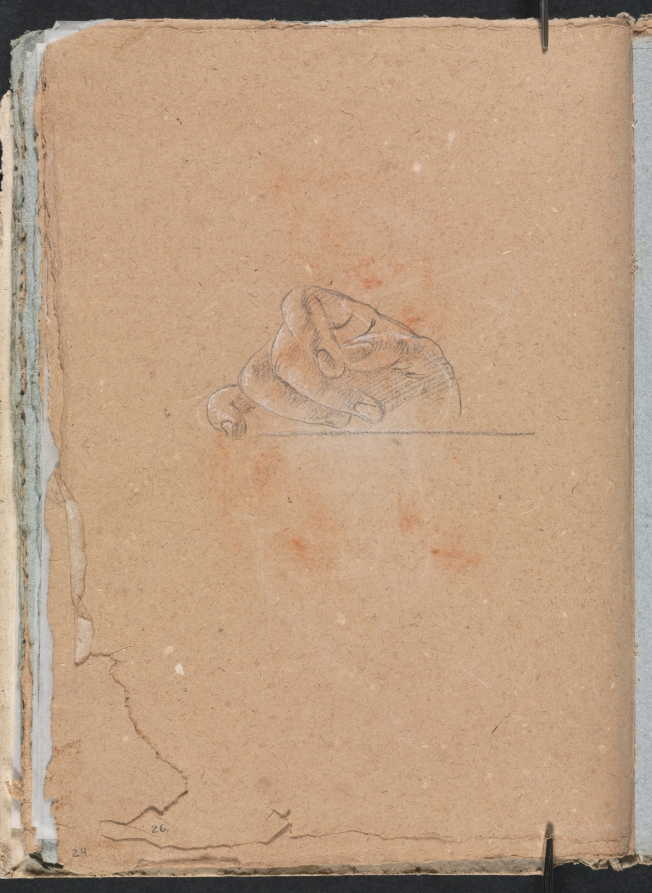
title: Verona Sketchbook:Right hand (page 26)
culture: Italy, 18th century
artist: Francesco Lorenzi (Italian, 1723–1787)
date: 1760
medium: black chalk with white heightening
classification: Bound Volume